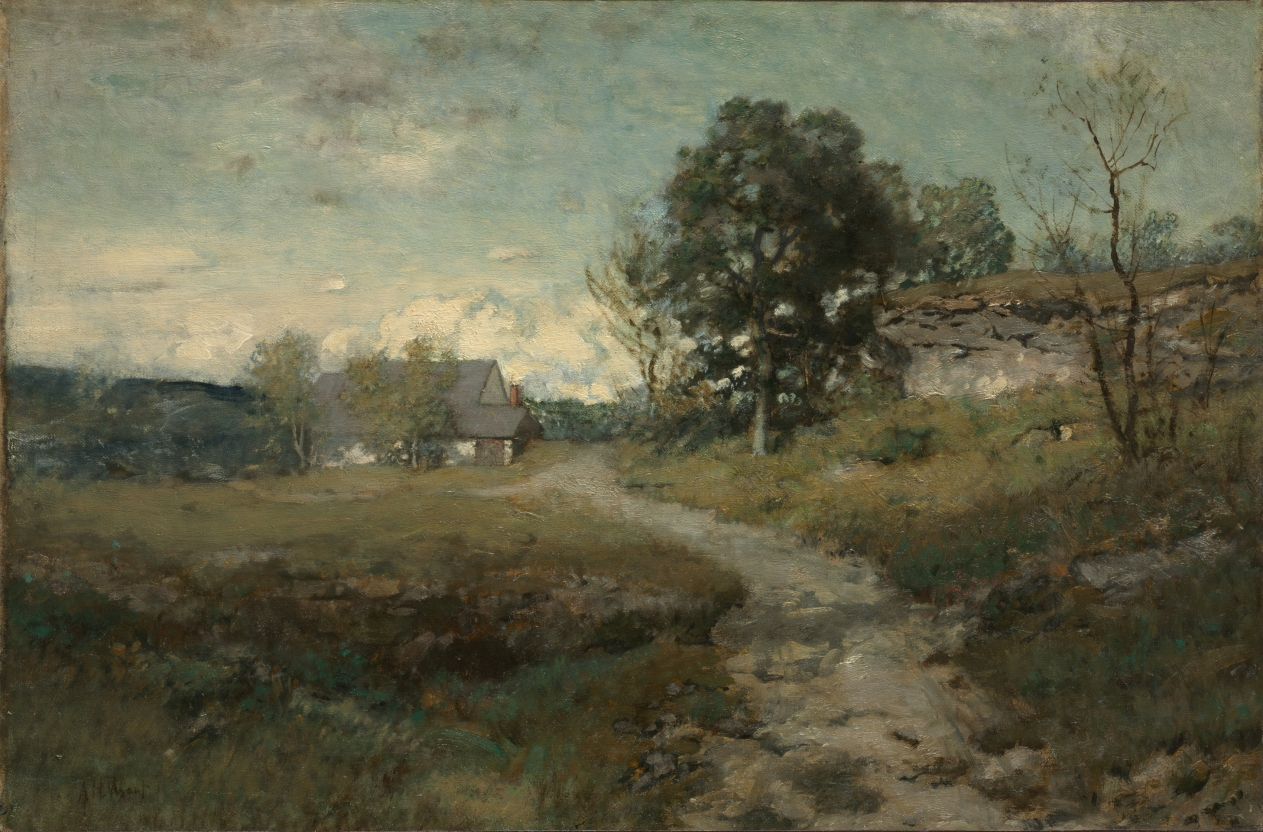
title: Arkville Landscape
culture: America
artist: Alexander H. Wyant (American, 1836–1892)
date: 1880s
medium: oil on canvas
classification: Painting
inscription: Signed lower left: "A.H. Wyant"